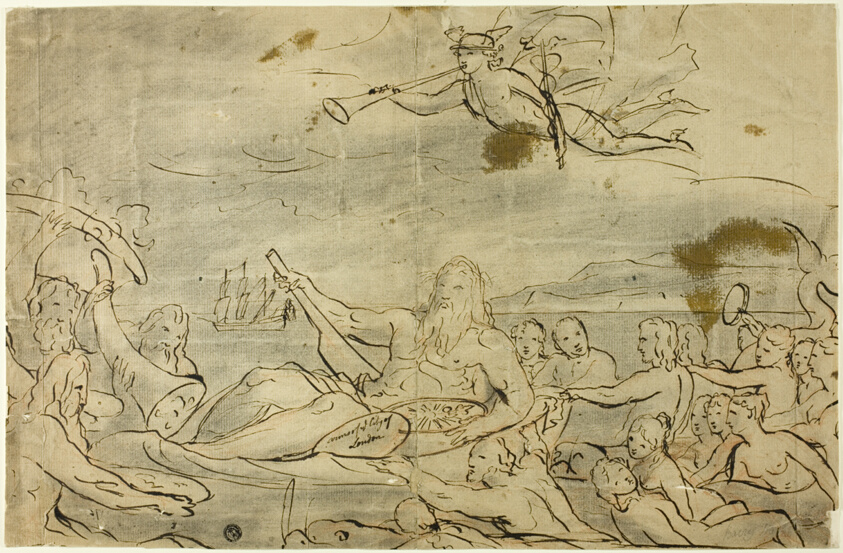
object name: Drawing and Watercolor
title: Study for Commerce or the Triumph of the Thames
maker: Attributed to James Barry; Irish, 1741-1806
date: 1767/80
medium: Pen and brown ink over red and black chalk on tan laid paper, laid down on ivory wove paper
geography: Ireland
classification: pen and ink drawings; drawings (visual works); prints and drawing